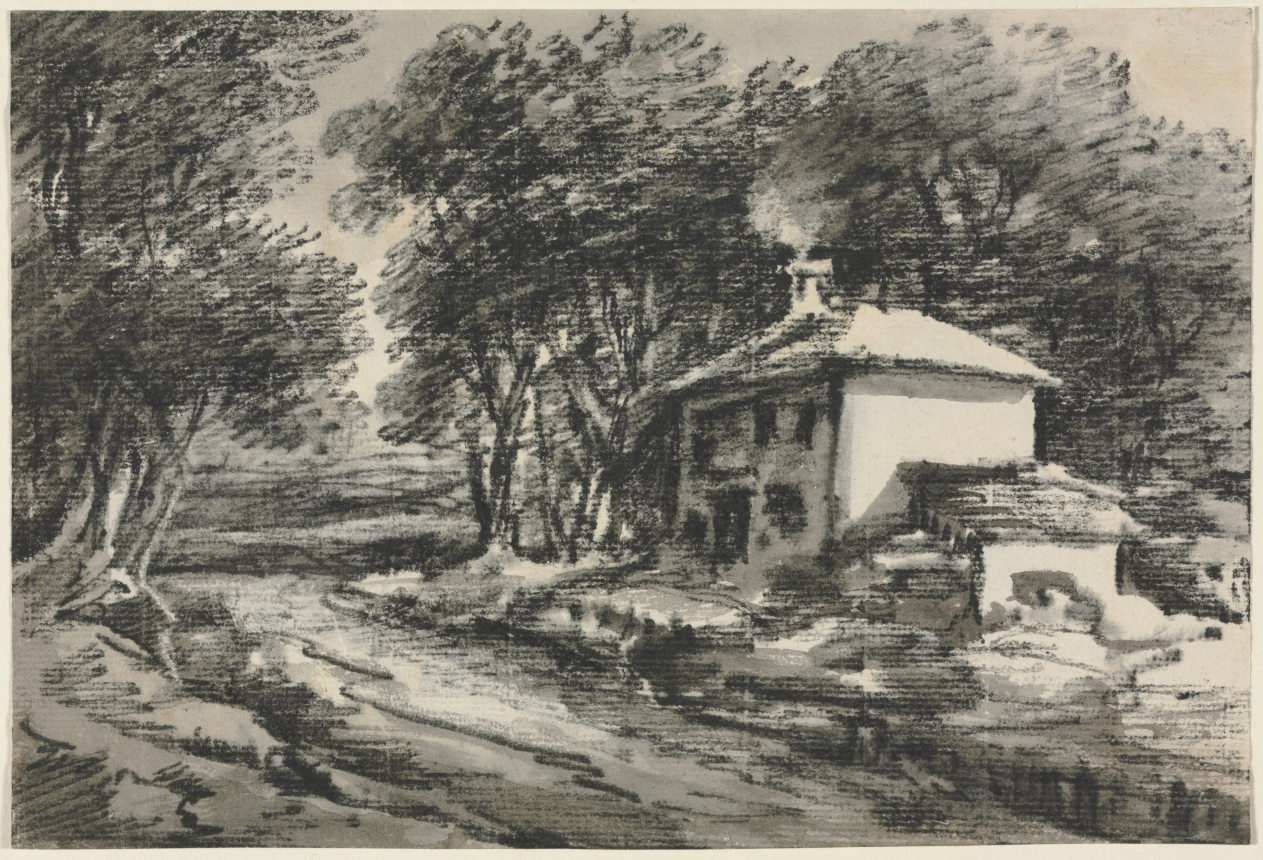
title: Landscape with Cottage (recto)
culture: England, 18th century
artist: Thomas Monro (British, 1759–1833)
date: c. 1820s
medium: black chalk and gray wash with scraping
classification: Drawing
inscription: verso, in graphite: A 16477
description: Dr. Thomas Monro is best known as a patron who exercised significant influence in the London art world in the late 18th and early 19th centuries, but he was also an amateur artist and competent follower of Thomas Gainsborough. The physician’s drawings were monochromatic, done in wash with additions of charcoal, chalk, or india ink in emulation of Gainsborough’s moody rural views. On the verso of the drawing is a mise-en-page of caricatures and a hillside—perhaps whimsically drawn by multiple artists at one of the doctor’s salons.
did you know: Dr. Thomas Monro established what became known as an "Academy," where artists gathered in the evenings to draw, at his home overlooking the Thames.